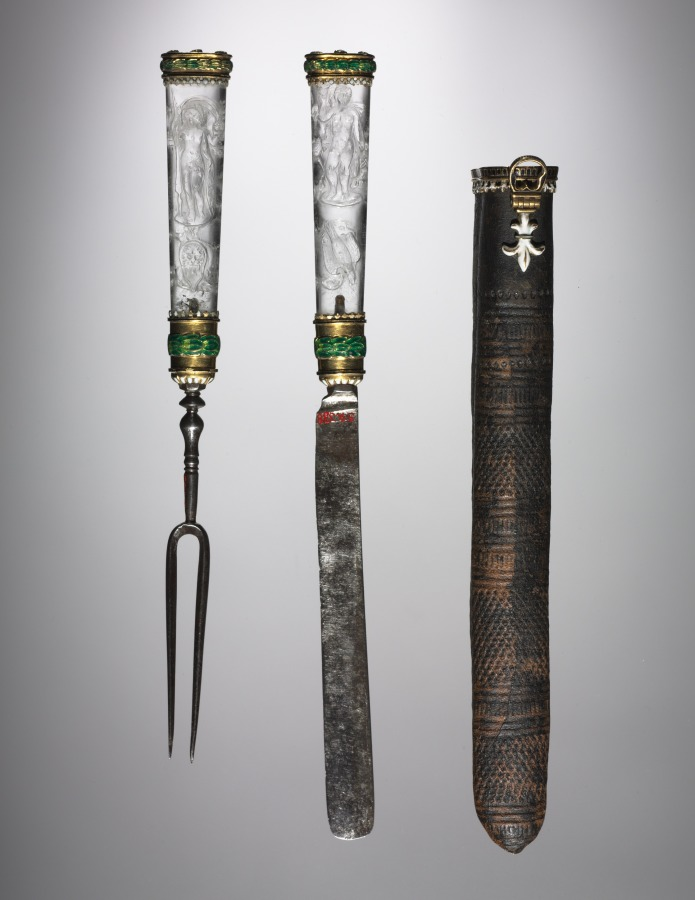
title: Knife and Fork with Sheath Set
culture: Italy, Venice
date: late 1500s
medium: gold, enamel, crystal, steel, leather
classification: Enamel